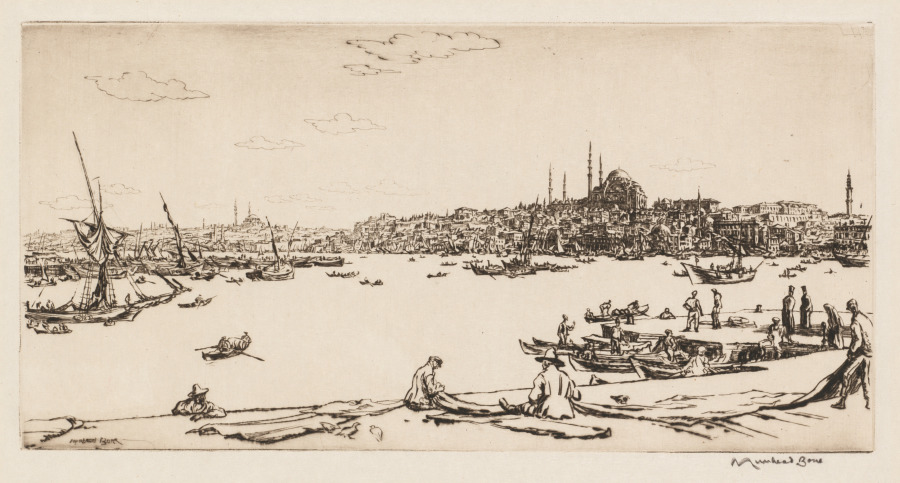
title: Constantinople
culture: England, 20th century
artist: Muirhead Bone (British, 1876–1953)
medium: drypoint in brown ink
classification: Print